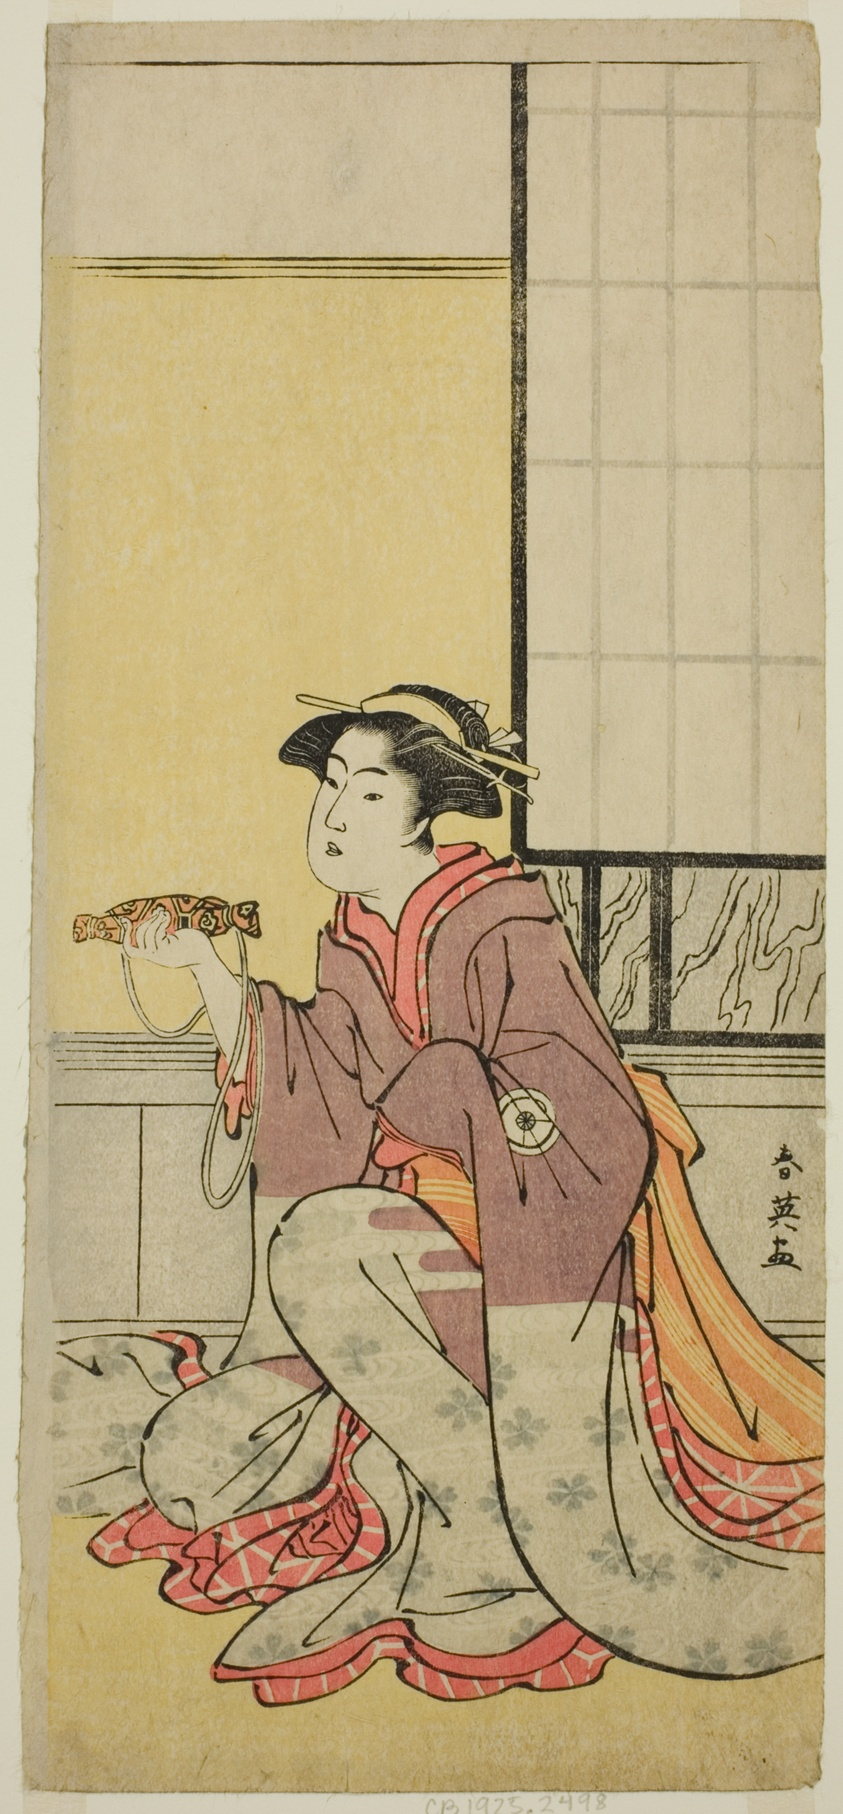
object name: Print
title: The Actor Iwai Hanshiro IV as Yae (?), in the Play Sugawara Denju Tenarai Kagami (?), Performed at the Kiri Theater (?) in the Seventh Month, 1788 (?)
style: Japanese (culture or style)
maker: Katsukawa Shun'ei (Japanese, 1762-1819)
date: c. 1788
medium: Color woodblock print; hosoban; right sheet of diptych (?)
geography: Japan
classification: woodblock print; print; asian art